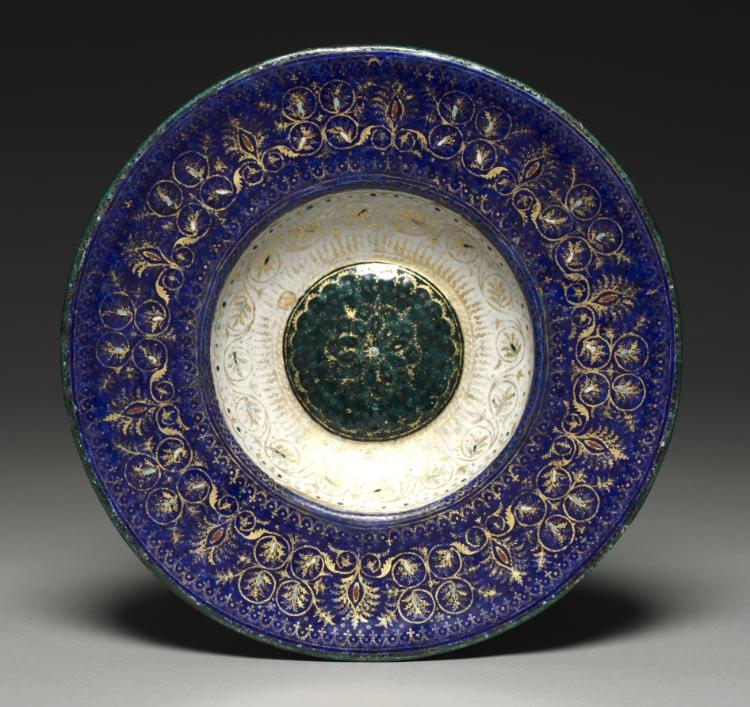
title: Dish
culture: Italy, Venice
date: late 1400s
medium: painted enamel on copper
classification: Enamel